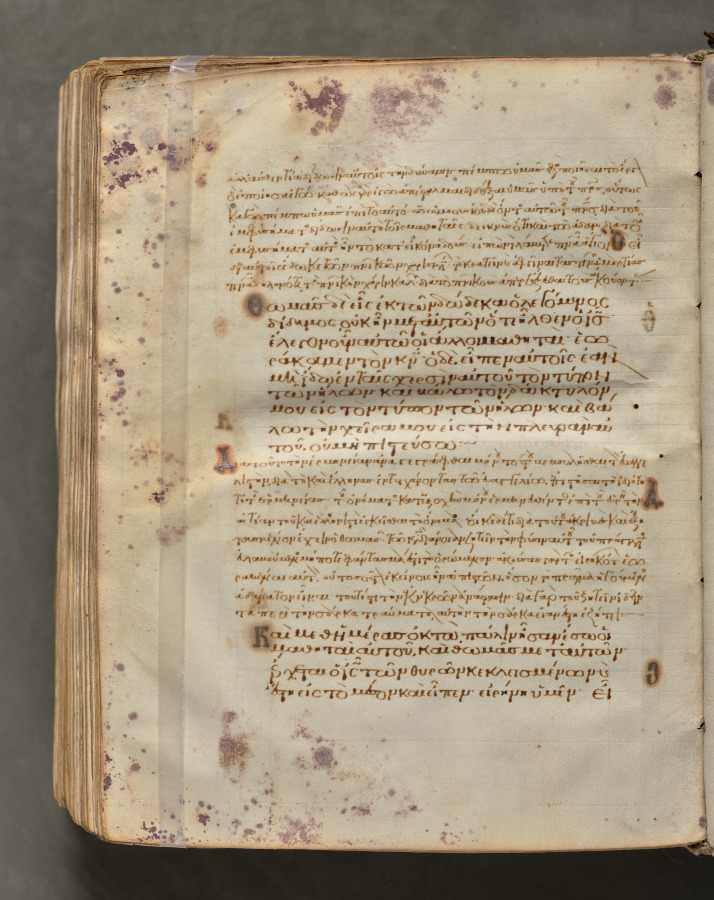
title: Text, folio 420 (verso), from a Gospel Book with Commentaries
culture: Byzantium, Constantinople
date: c. 1000–1100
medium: ink, tempera, and gold on vellum; leather binding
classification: Bound Volume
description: Each of the four gospels in this book opens on a page with brilliantly illuminated borders depicting the author of the text as well as birds—principally peacocks, symbols of the immortality of the soul—and fountains, representing the fountain of life and the salvation of the soul. This volume consists of 428 leaves with texts in Greek. Its level of sophistication suggests that it was probably written and decorated in a monastery in Constantinople.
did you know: Gospel books were carried in procession through Byzantine churches.